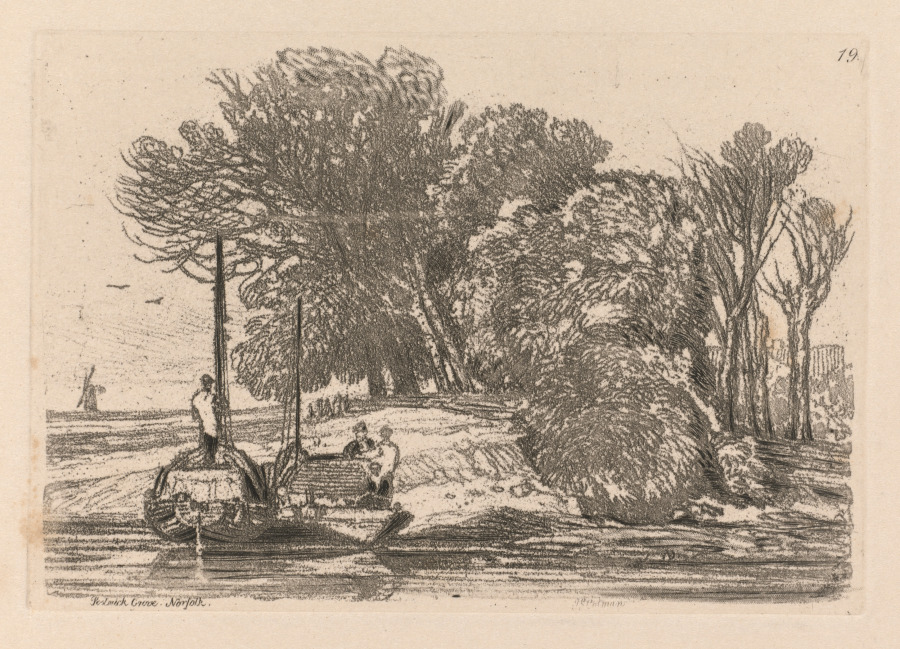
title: Liber Studiorum: Plate 19, Postwick Grove, Norfolk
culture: England, 19th century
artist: John Sell Cotman (British, 1782–1842)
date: 1838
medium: softground etching, from a bound volume containing 48 plates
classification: Bound Volume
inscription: In plate, within image, upper right: 19; in plate, below image: Postwick Grove, Norfolk